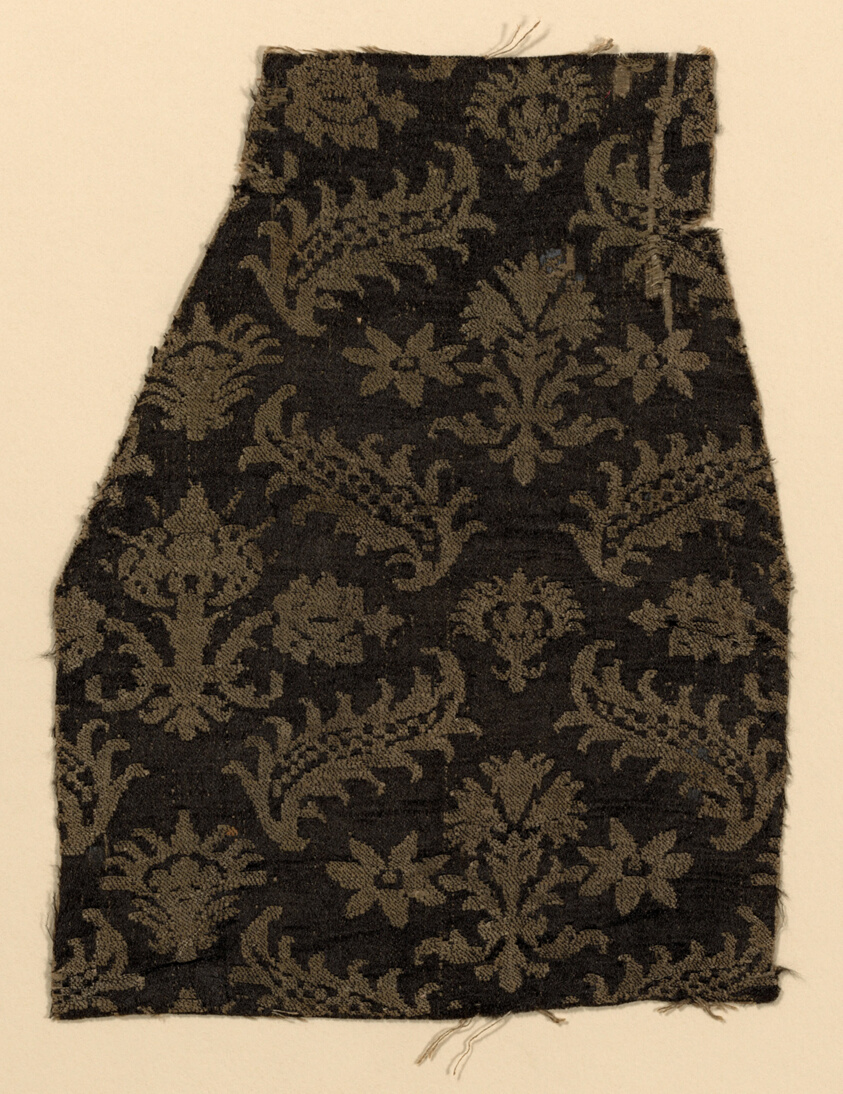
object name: Textile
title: Fragment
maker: Italy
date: 1600/50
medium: satin damask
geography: Italy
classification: textile; weaving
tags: flowers